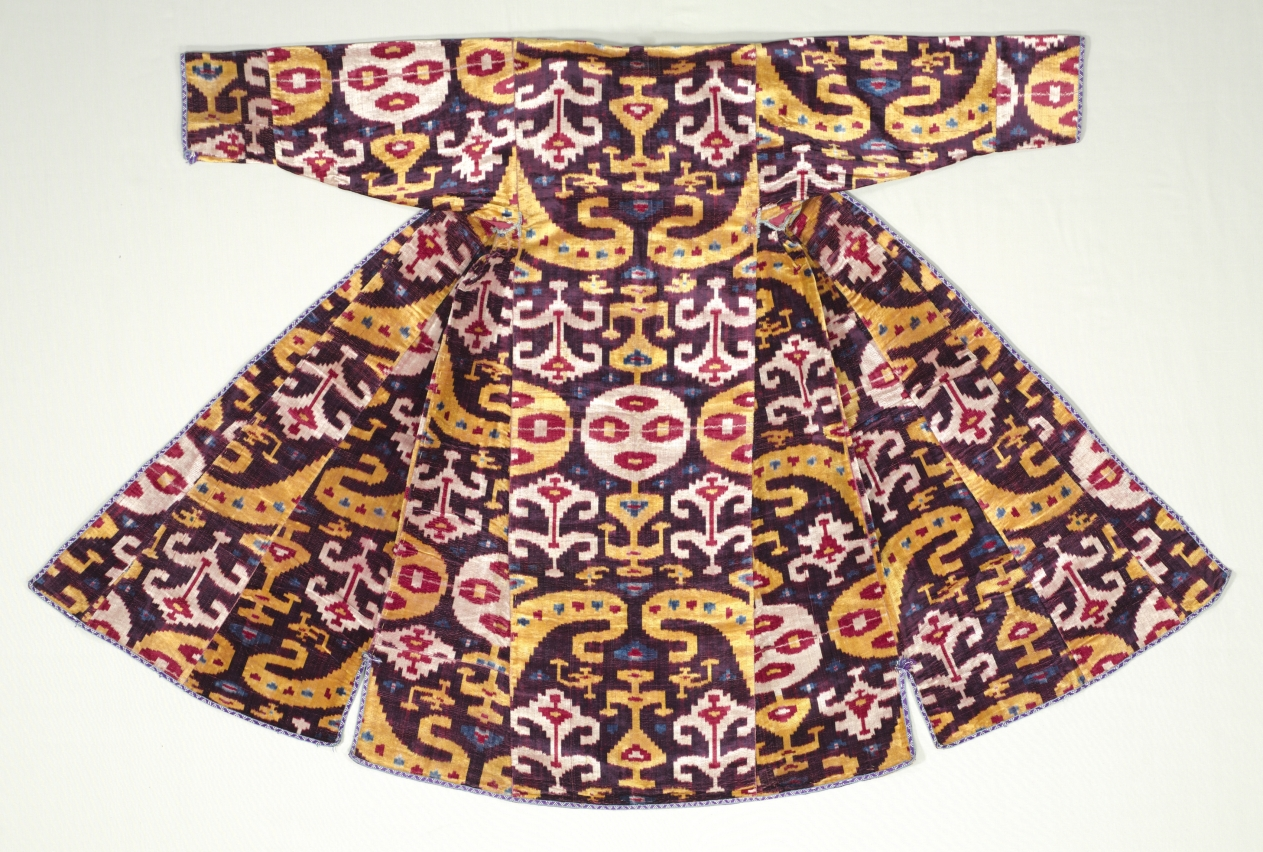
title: Woman’s Robe (munisak)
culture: Uzbekistan, Bukhara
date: 1850–75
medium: Silk: velvet ikat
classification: Garment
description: Dazzling ikat velvet robes, the most sumptuous, expensive, and prestigious type of ikat, were worn throughout Central Asia by men and women. This resplendent robe with a V-shaped neckline, fitted torso, and slightly flaring skirt features stylized blossoming plants, pomegranates, and auspicious curved ram’s horns, all with irregular contours of the resist-dye ikat technique. Such female robes were culturally significant in Central Asia. Made for wedding dowries with fabric from the groom’s family, women wore munisaks for rites of passage throughout their lives, as a bride, at family festivals, and funerals.